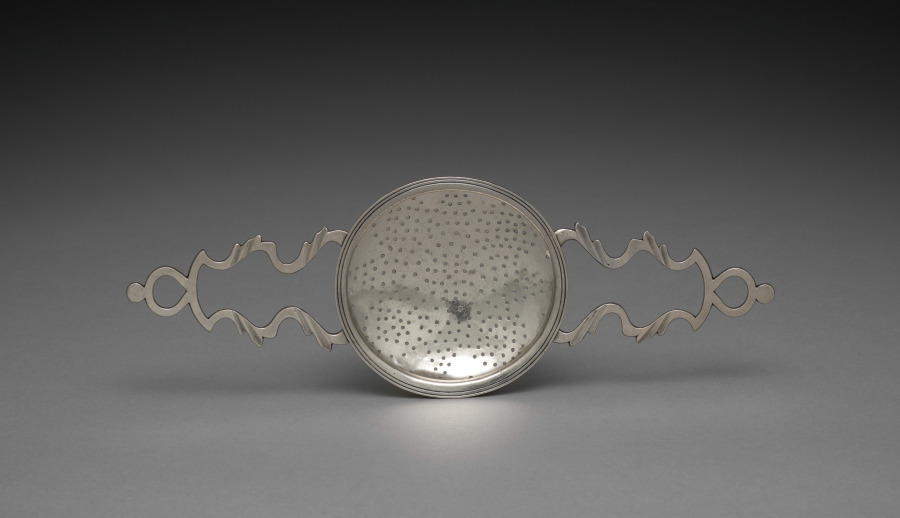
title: Strainer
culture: America, Massachusetts, Boston and Salem, 18th century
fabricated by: Daniel Parker (American, 1726–1785)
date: c. 1765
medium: silver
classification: Silver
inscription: engraved "H" over "B + H" in shaded block letters on side of bowl.